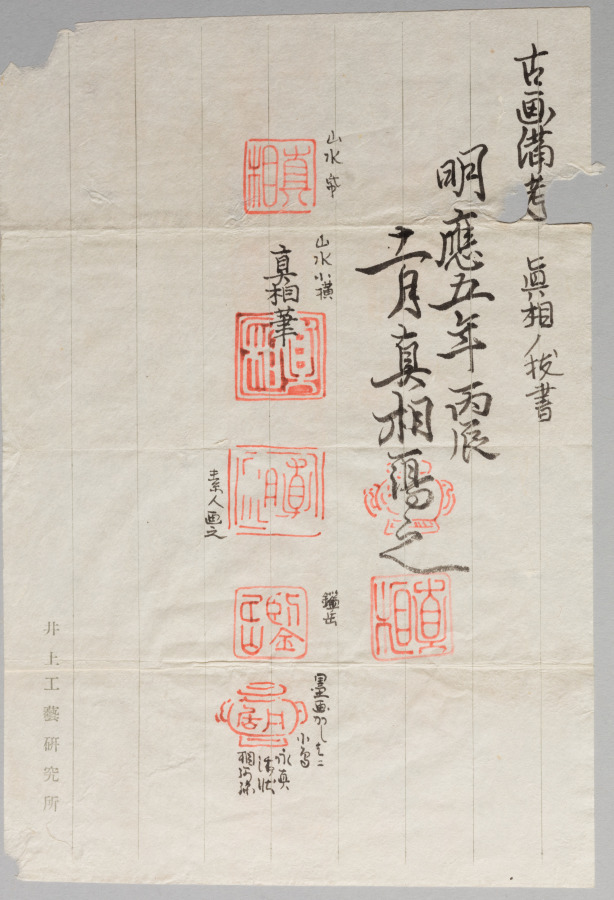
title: Landscape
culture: Japan, Edo period (1615–1868)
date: early 1600s to mid-1800s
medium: hanging scroll; ink on paper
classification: Painting